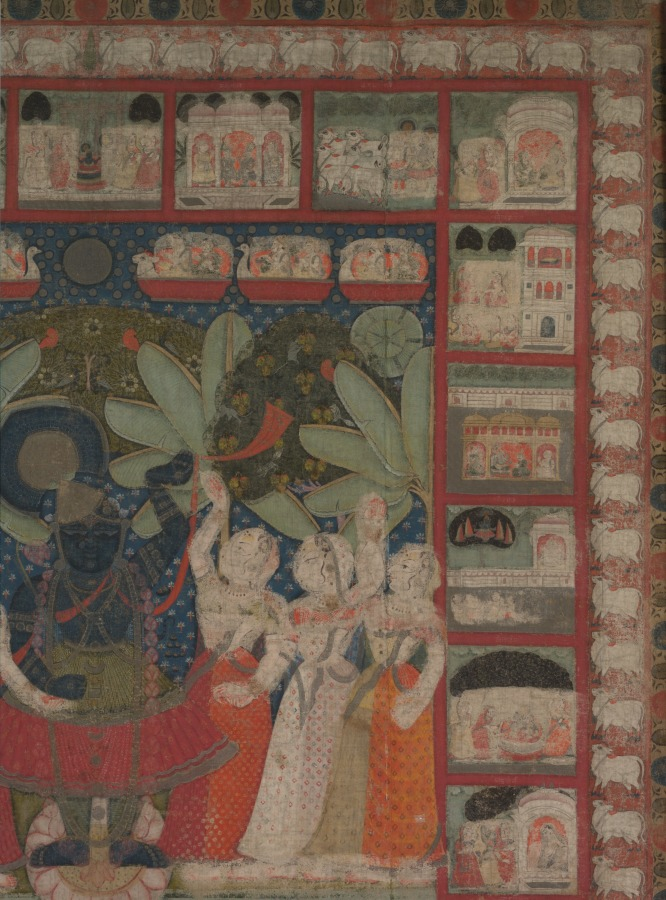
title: Pichvai of Shri Nathji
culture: Northwestern India, Rajasthan, Nathdwara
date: 1825–50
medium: Gum tempera, silver, and gold on cotton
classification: Painting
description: Painted-cloth devotional wall hangings (pichvai) form the backdrop to the worship of Krishna as Shri Nathji. As a result of long-term exposure, these textiles are usually faded and worn. The icon of Krishna as Shri Nathji is the central figure. On either side of him, milkmaids with arms entwined join him in a state of ecstasy. Experiencing the bliss of divine play (lila) with Krishna is the main religious goal for followers of the Pushti Marg sect of Hinduism to which this work belongs. Episodes from the life of Krishna and a border of adoring cows frame the central scene.